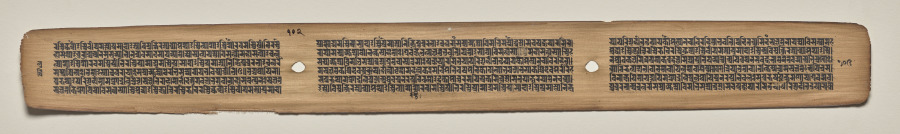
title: Text, Folio 102 (verso), from a Manuscript of the Perfection of Wisdom in Eight Thousand Lines (Ashtasahasrika Prajnaparamita-sutra)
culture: Eastern India, Bihar, Vikramashila Monastery. Painting: Nepal, Kathmandu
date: Sunday, September 14, 1119 (year 239 of the Newar Samvat in the month of Ashvina)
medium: gum tempera and ink on palm leaves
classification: Painting